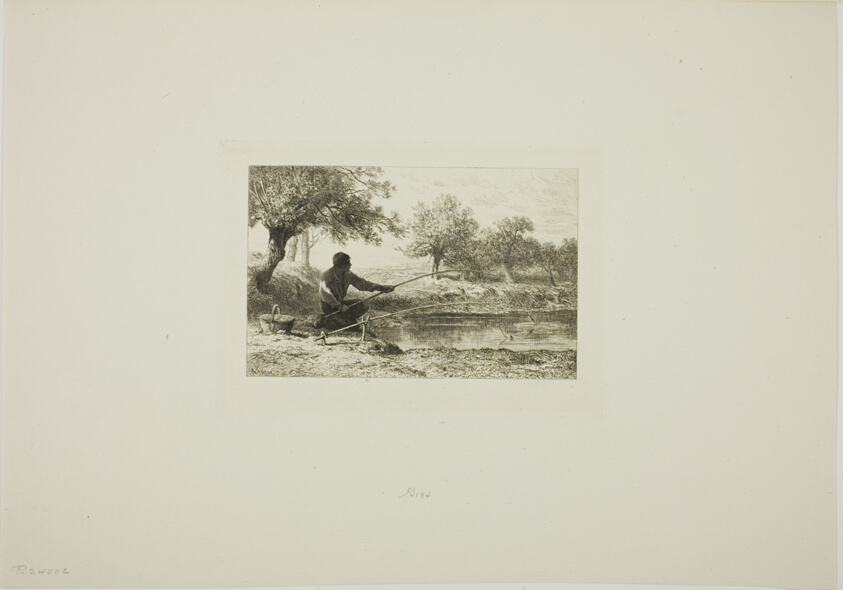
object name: Print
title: Pole Fishing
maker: Charles Émile Jacque (French, 1813-1894)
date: c. 1864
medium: Etching and drypoint on ivory laid paper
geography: France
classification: etching; print; prints and drawing